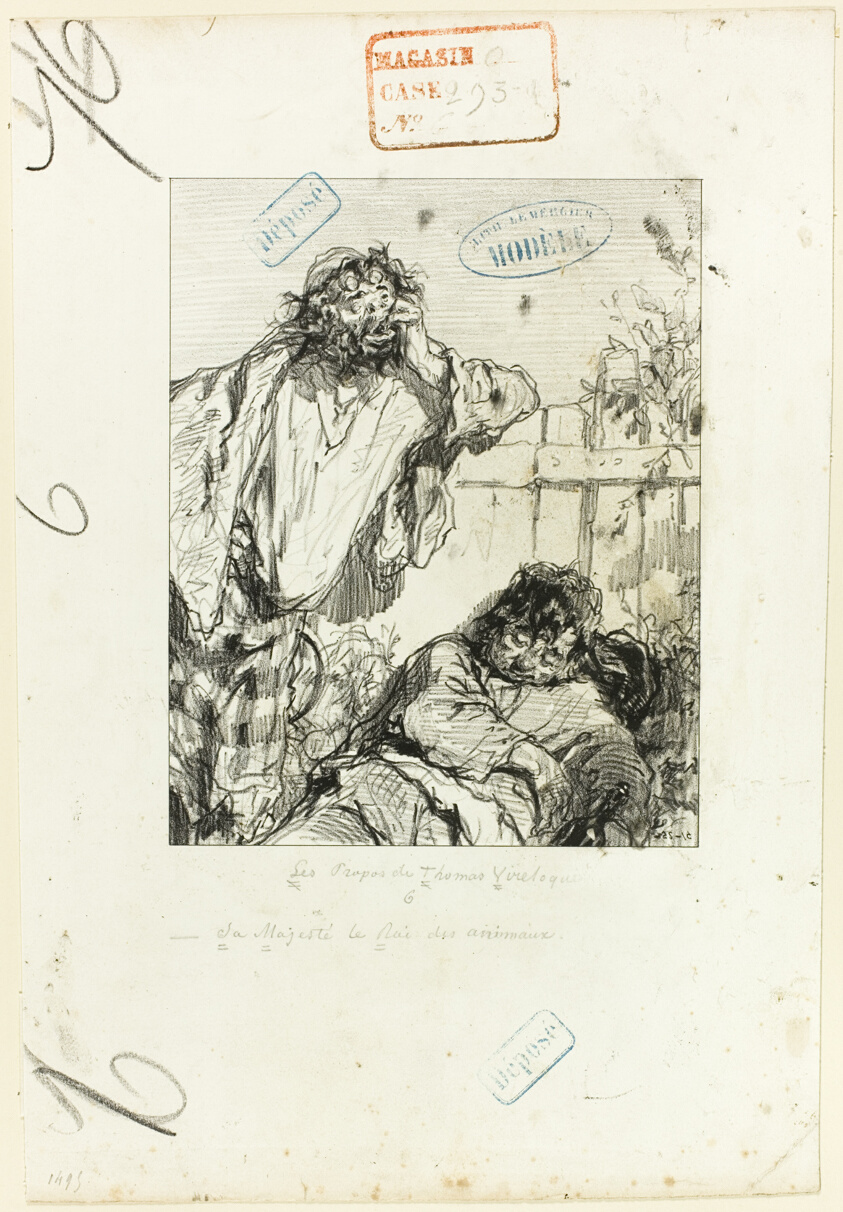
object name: Print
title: Les Propos de Thomas Vireloque: His Majesty the King of beasts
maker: Paul Gavarni (French, 1804-1866)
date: 1852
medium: Lithograph in black on cream wove paper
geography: France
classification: lithograph; print; prints and drawing